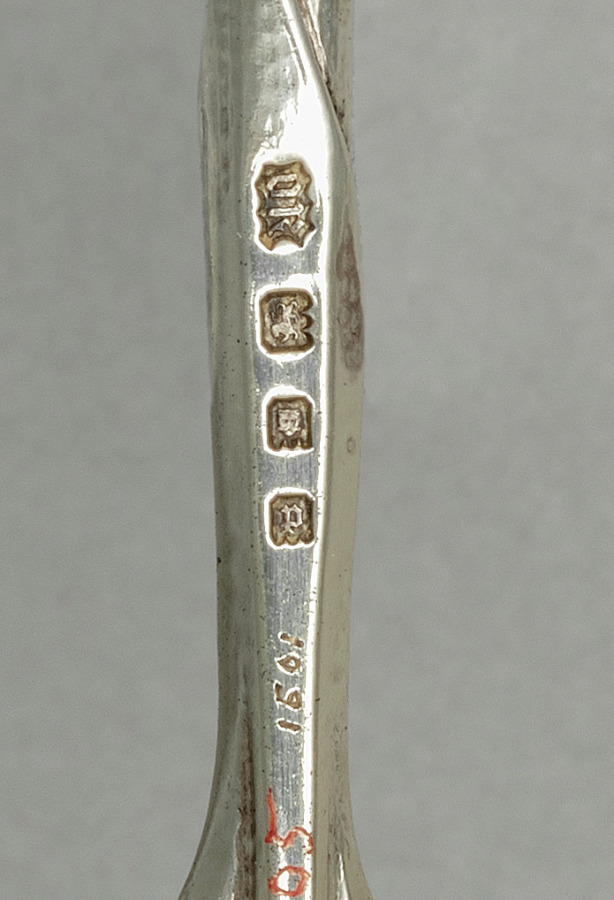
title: Caviar Spoon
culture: England, 20th century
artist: Omar Ramsden (British, 1873–1939)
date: 1930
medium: silver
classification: Silver